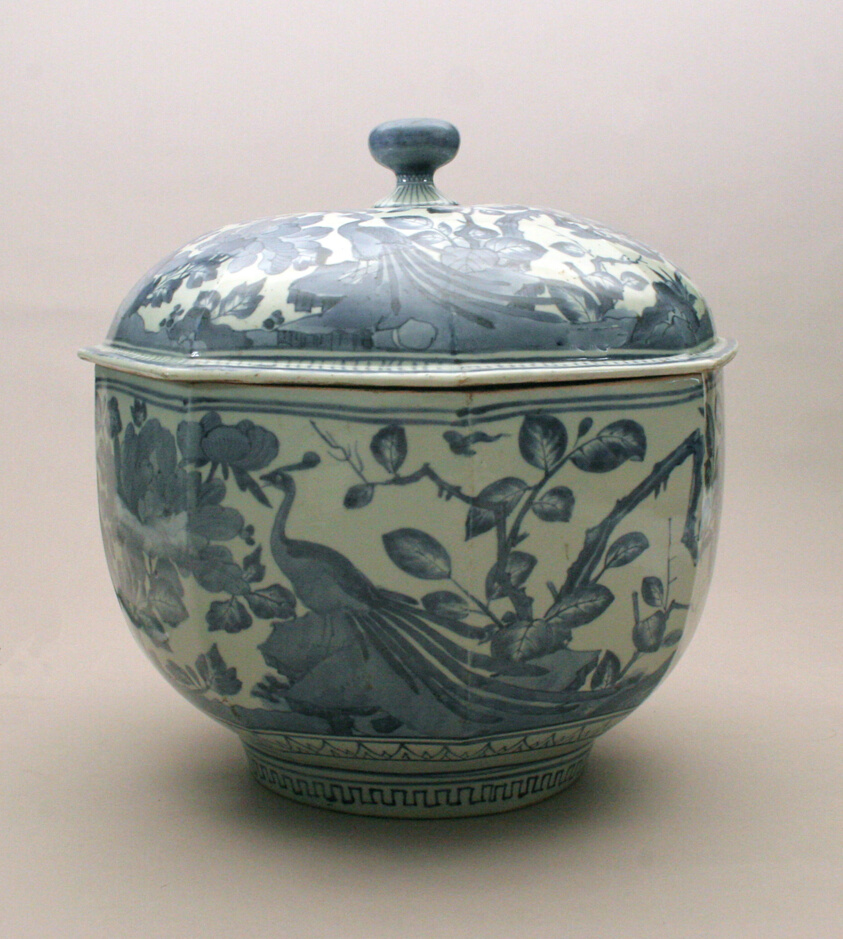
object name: Ceramics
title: Arita-Ware Covered Jar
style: Japanese (culture or style)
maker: Japan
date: 17th/18th century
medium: Porcelain with underglaze blue decoration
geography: Japan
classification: ceramics; asian art